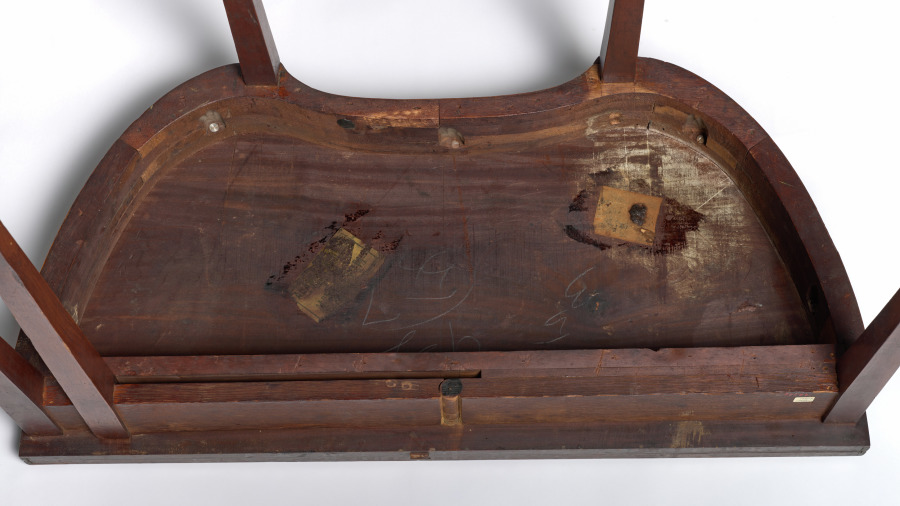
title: Game Table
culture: America, Maryland, Baltimore, early 19th Century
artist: style of George Hepplewhite (American, 1786)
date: c. 1800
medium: mahogany with inlays of various woods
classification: Furniture and woodwork